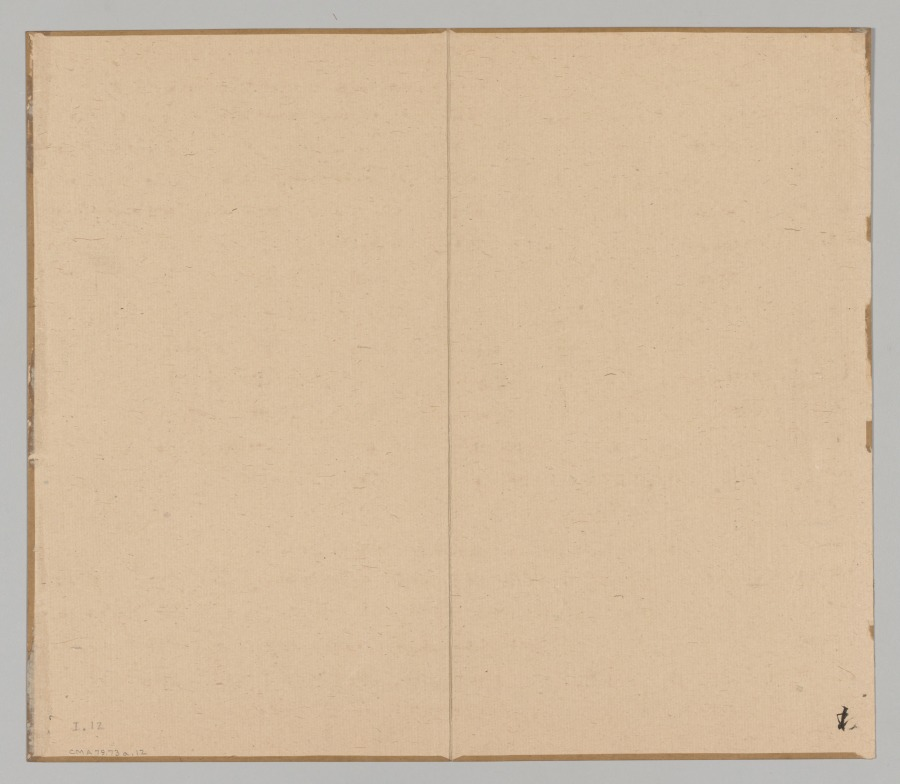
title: Reverberations of Taiga, Volume 1 (leaf 12)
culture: Japan, Edo period (1615–1868)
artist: Aoki Shukuya (Japanese, d. 1802)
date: mid- to late 1700s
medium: double-leaf from a pair of albums; ink and light color on paper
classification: Portfolio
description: Traditionally, young painters in Japan began their studies with an established master-painter. The master's compositions invariably became models that the apprentice copied to learn various ink and brush techniques. Shukuya was a pupil of the famous Kyoto artist Ikeno Taiga, whose style is reflected in these sketches of rocks, trees, and mountains.